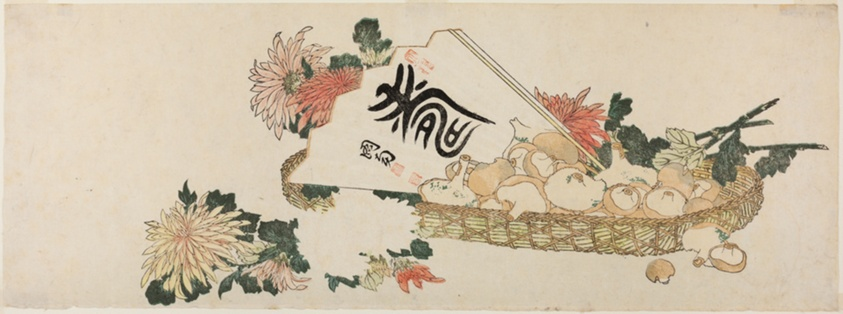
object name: Print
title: An Autumn Gift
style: Japanese (culture or style)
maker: Katsushika Hokusai 葛飾 北斎; Japanese, 1760-1849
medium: Color woodblock print; surimono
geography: Japan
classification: woodblock print; print; asian art